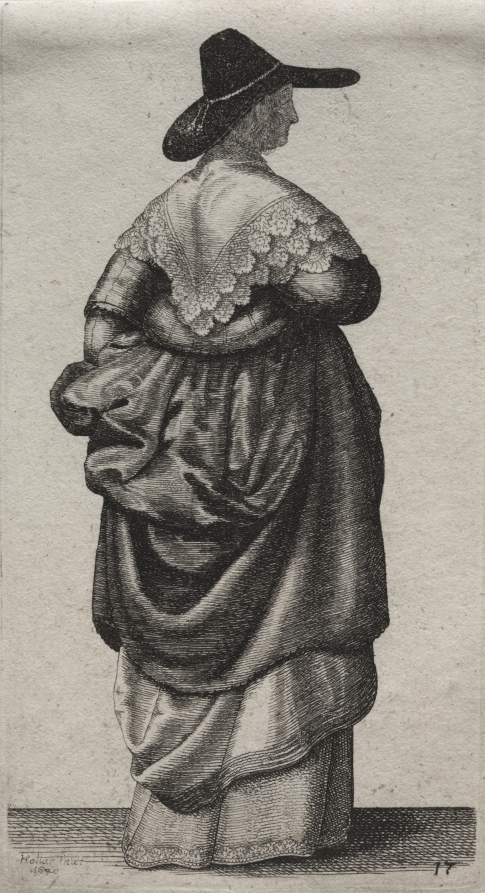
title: The Several Habits of English Women, from the Nobility to the Country Women as they are in these times: The Woman with a Mannish Hat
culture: Bohemia, 17th century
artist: Wenceslaus Hollar (Bohemian, 1607–1677)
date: 1640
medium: etching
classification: Print